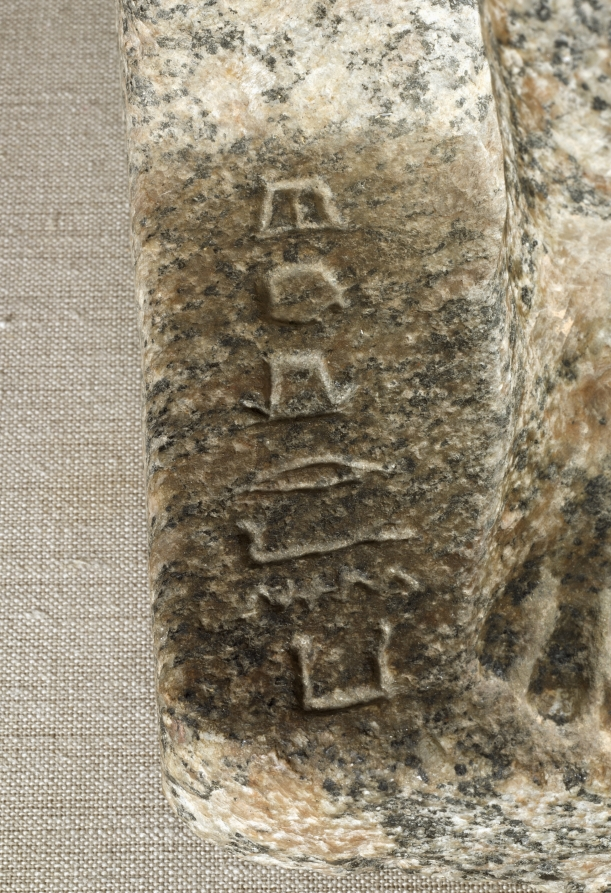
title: Seated Statue of Nykara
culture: Egypt, Old Kingdom (2647–2124 BCE), Dynasty 5, reign of Nyuserre (2445–2422 BCE) or later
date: 2408–2377 BCE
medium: red granite and pigment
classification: Sculpture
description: This statue inscribed on the base for the chief of the granary, Nykara, comes from the same tomb as the false door. A statue of granite was an expensive commodity. Monumental red granite was quarried at Aswan in the south of Egypt and had to be shipped more than five hundred miles downstream to Nykara's tomb in the area of Memphis.